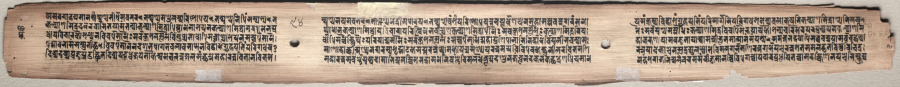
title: Text, folio 94 (verso) from a Gandavyuha-sutra (Scripture of the Supreme Array)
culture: Nepal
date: 1000–1100s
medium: ink on palm leaf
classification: Painting